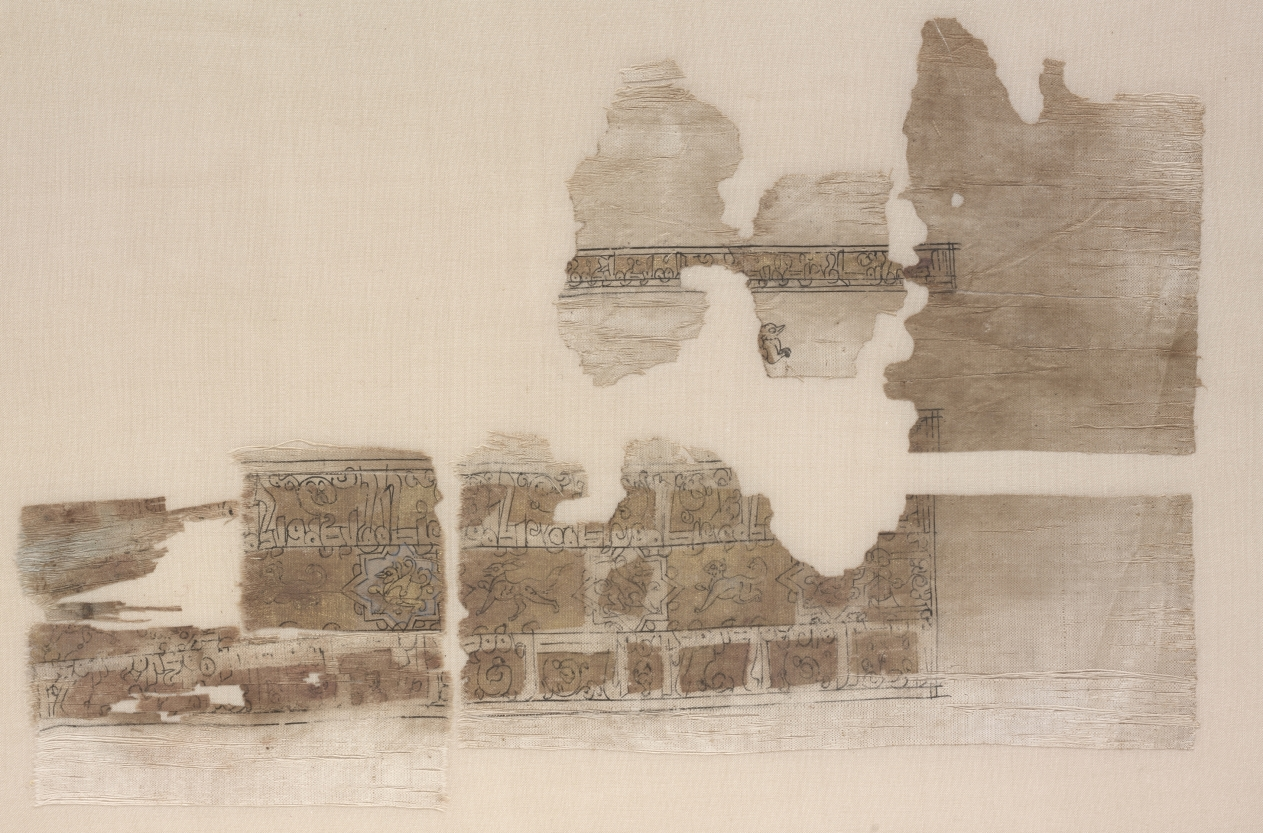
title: Fragment with tripartite band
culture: Iran or Iraq, Seljuq period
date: 1000s–1100s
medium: Silk warp and cotton weft (mulham): plain weave; gold leaf and ink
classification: Textile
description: This three-part band consists of two opposing bands of inscriptions flanking an ornamental band of winged griffins within eight-pointed stars, separated by various creatures—a rabbit, a cheetah, and possibly a sphinx. The inscriptions in the band are in simple Kufic against a floriated background. They, as well as the single band of inscription above, repeat in various combinations as benedictions, "endurance and good fortune, blessing, peace." The patches forming the background are gold, the design is drawn in black, and the background of only one star is blue. This textile probably reflects the international fashion or may have been made for export to Egypt, where this fragment likely survived.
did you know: Gold leaf was applied on mulham and decorated mostly likely with a stylus (pen) and ink drawing.